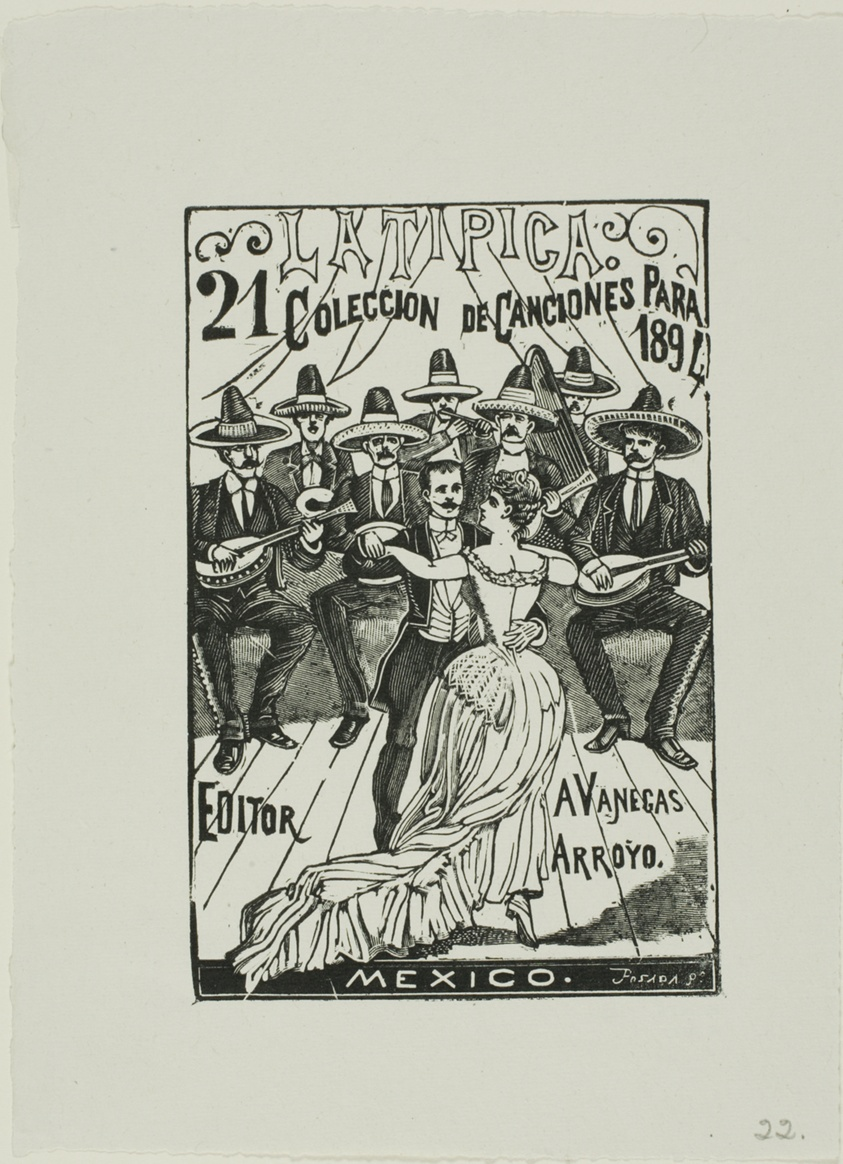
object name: Print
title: The "Typical"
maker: José Guadalupe Posada (Mexican, 1852-1913)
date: c. 1894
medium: Relief etching on zinc on paper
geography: Mexico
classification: relief etching; print; prints and drawing